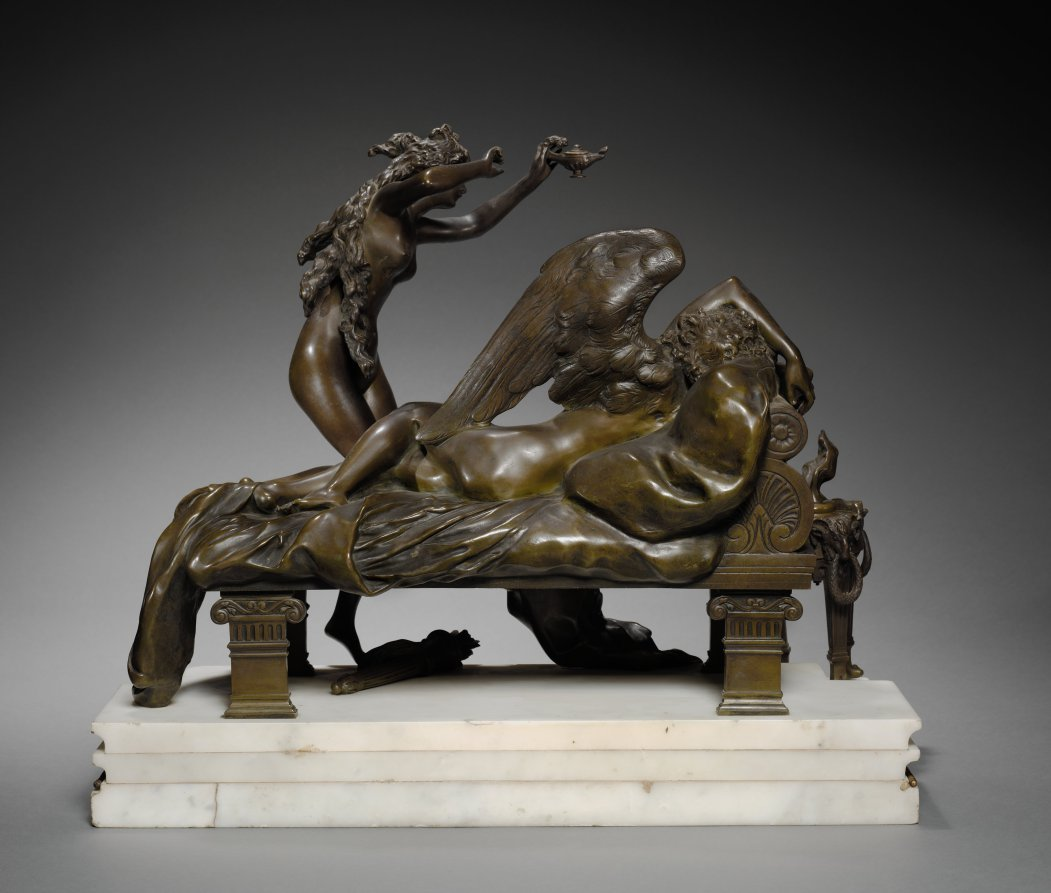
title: Cupid and Psyche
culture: France, 19th century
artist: Albert-Ernest Carrier-Belleuse (French, 1824–1887)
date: c. 1870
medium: bronze with marble base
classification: Sculpture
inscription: signed in ligature on edge of couch at head: "Carrier Belleuse."